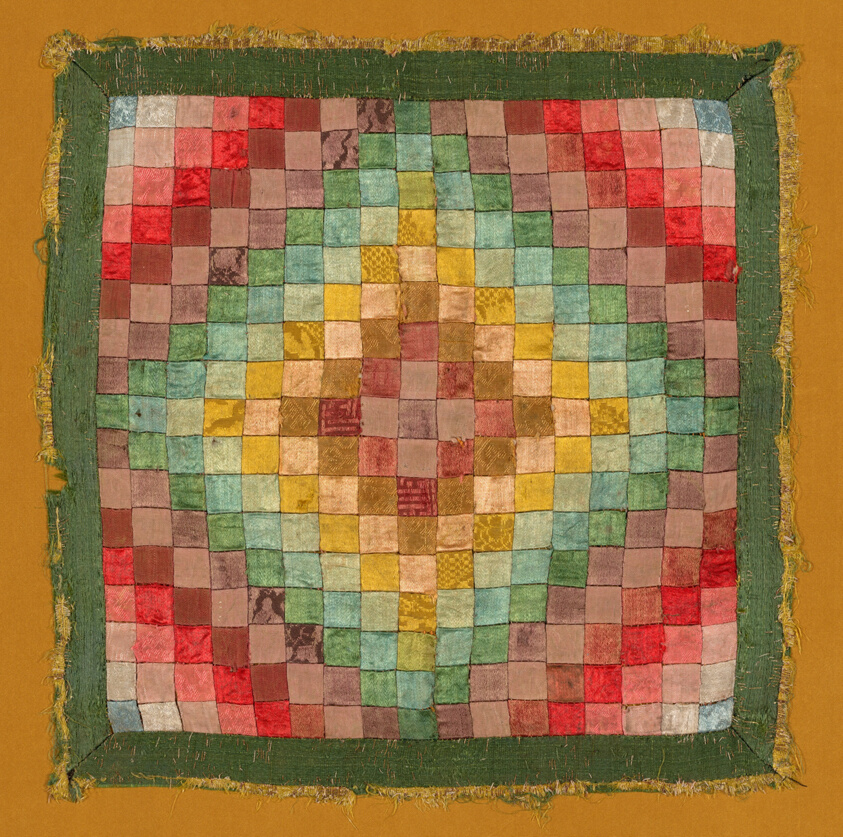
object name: Textile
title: Square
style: East Asian, asian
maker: Bhutan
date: 18th century, late Ming dynasty (1368–1644)/ early Qing dynasty (1644–1912)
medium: 289 small squares of silk, 7:1 satin damask weave, 7:1 satin weave, 4:1 satin damask weave, 4:1 satin weave, 4:1 satin weave self-patterned by areas of plain weave, and 3:1 twill weave self-patterned by areas of plain weave and plain weave; pieced; edged with silk and gold-leaf-over-lacquered-paper strips, 4:1 satin weave with supplementary patterning wefts and silk and gold-leaf-over-lacquered-paper strips, 7:3 float weave self-patterned by ground weft floats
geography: Bhutan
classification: textile; needlework (visual works)